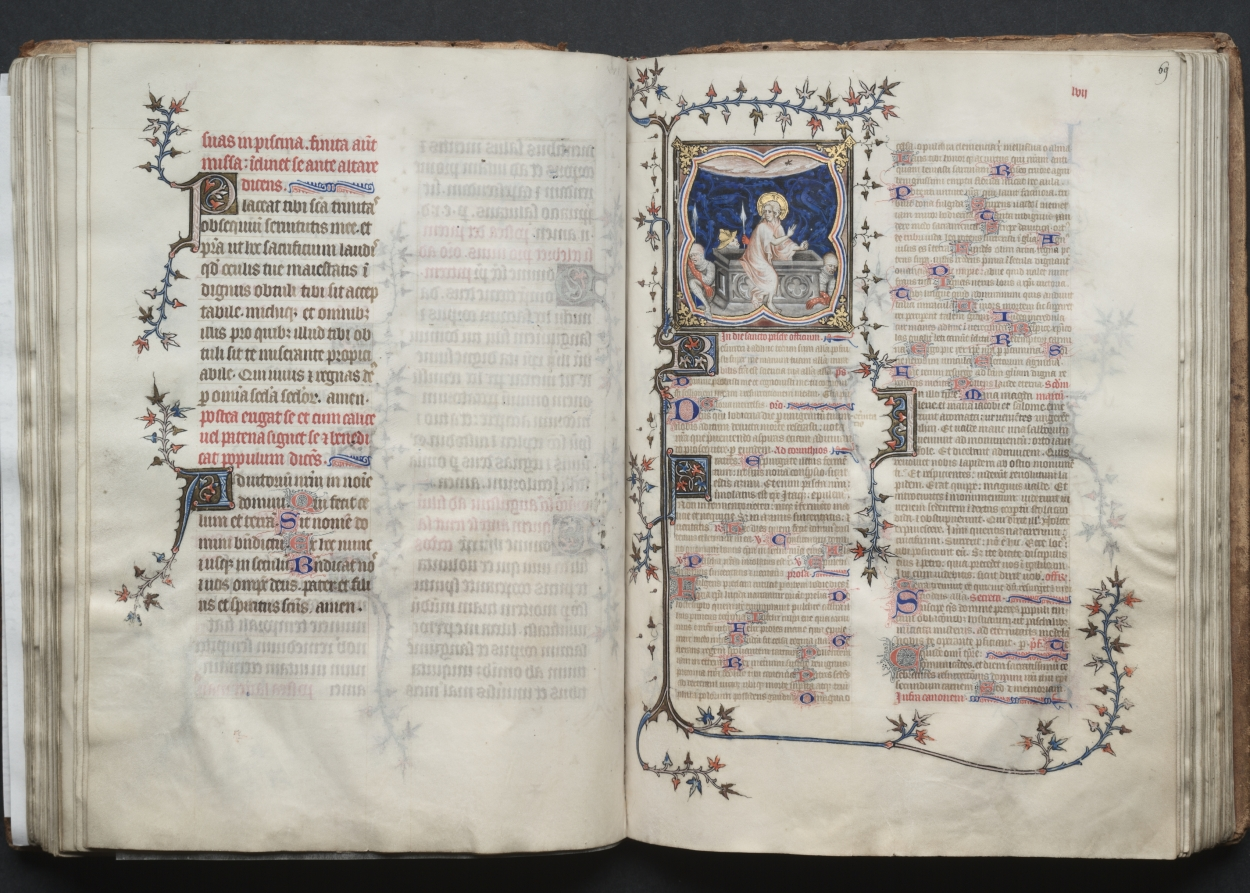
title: The Gotha Missal: Fol. 69r, The Resurrection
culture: France, Paris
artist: Master of the Boqueteaux (French)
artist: and Workshop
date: c. 1375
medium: ink, tempera, and gold on vellum; blind-tooled leather binding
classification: Bound Volume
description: The style and quality of this manuscript's decoration is typical of deluxe Parisian books made for aristocratic or royal patrons. Most of the book's decoration appears to be the work of the Master of the Boqueteaux, an artist active at the court of King Charles V (died 1380). His style was apparently shared by a number of book illuminators working in and around Paris. It is very possible that the Gotha Missal belonged to Charles V, but is not provable because the manuscript has no royal portraits and lacks a colophon. Given the book's magnificent decoration, however, it would seem that it was produced for a Valois prince, if not for the king himself. The manuscript receives its name from the German dukes of Gotha, its later owners.